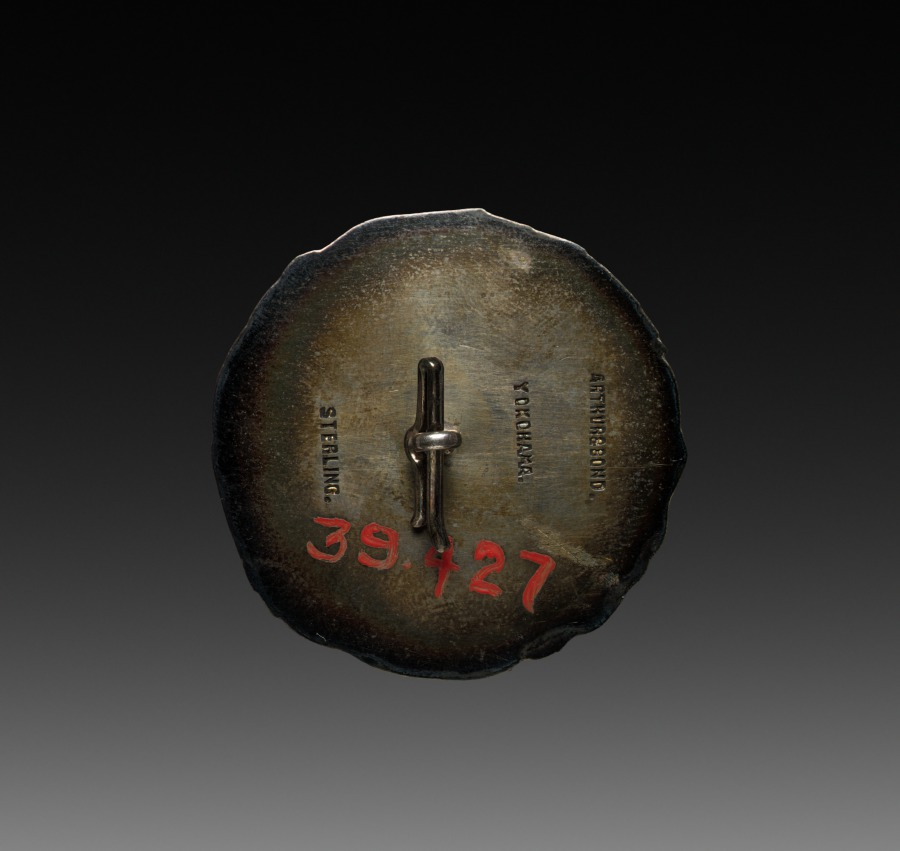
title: Button with Dragon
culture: Japan, Meiji period (1868–1912) to Taishō period (1912–26)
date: early 1900s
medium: One of a set of six buttons; cast (?) silver with relief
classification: Metalwork